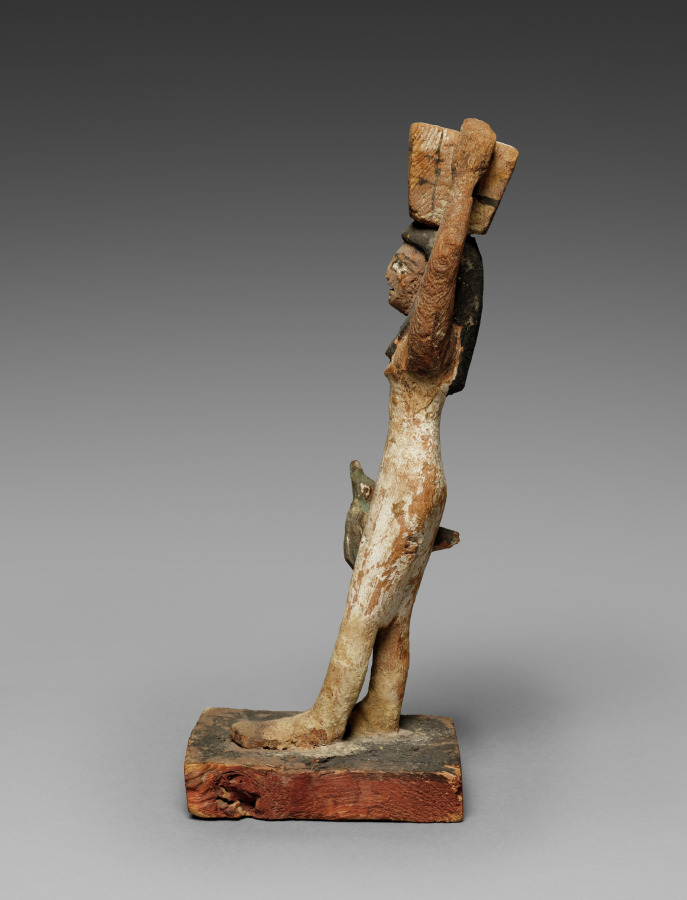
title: Female Offering Bearer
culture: Egypt, Middle Kingdom (2040–1648 BCE), Dynasties 11–12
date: 2000–1801 BCE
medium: painted wood, figure of tamarisk(?), base of sycamore fig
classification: Wood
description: The offering bearer wears a basic wraparound kalasiris dress and a strap that connects to the dress over her left shoulder. It is not known whether straps on ancient Egyptian dresses were designed as a part of the garment or were separate attachments for fashionable or utilitarian purposes. Ancient Egyptian illustrations typically identify women who wore this garment with a strap as servants, whereas artisans depicted men of all socioeconomic levels wearing the version for men.